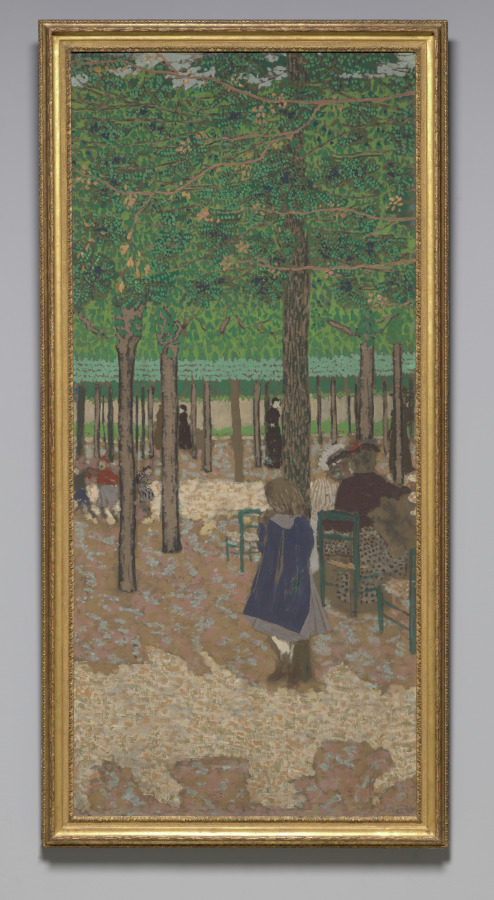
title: Under the Trees (from "The Public Gardens")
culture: France, 19th century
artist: Édouard Vuillard (French, 1868–1940)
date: 1894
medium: distemper on fabric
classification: Painting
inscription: Signed lower right: E. Vuillard 94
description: This painting is from a nine-panel decorative series showing children playing in two of Paris’s most spacious parks: the Tuileries Gardens and the Bois de Boulogne. It depicts a game of hide-and-seek in which a girl conceals herself behind a tree. The stillness of the women resting on green chairs at the right is countered by children running at the left. Rather than a realistic rendering of the subject, Édouard Vuillard arranged the composition in bands of colorful, decorative patterns so that the painting seems like a tapestry.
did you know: Vuillard's social circle included actors and directors. He often contributed to their theatrical pursuits by designing costumes, programs, and set pieces. In this panel from a nine-part series, a patterned landscape recalls scenery for the stage.